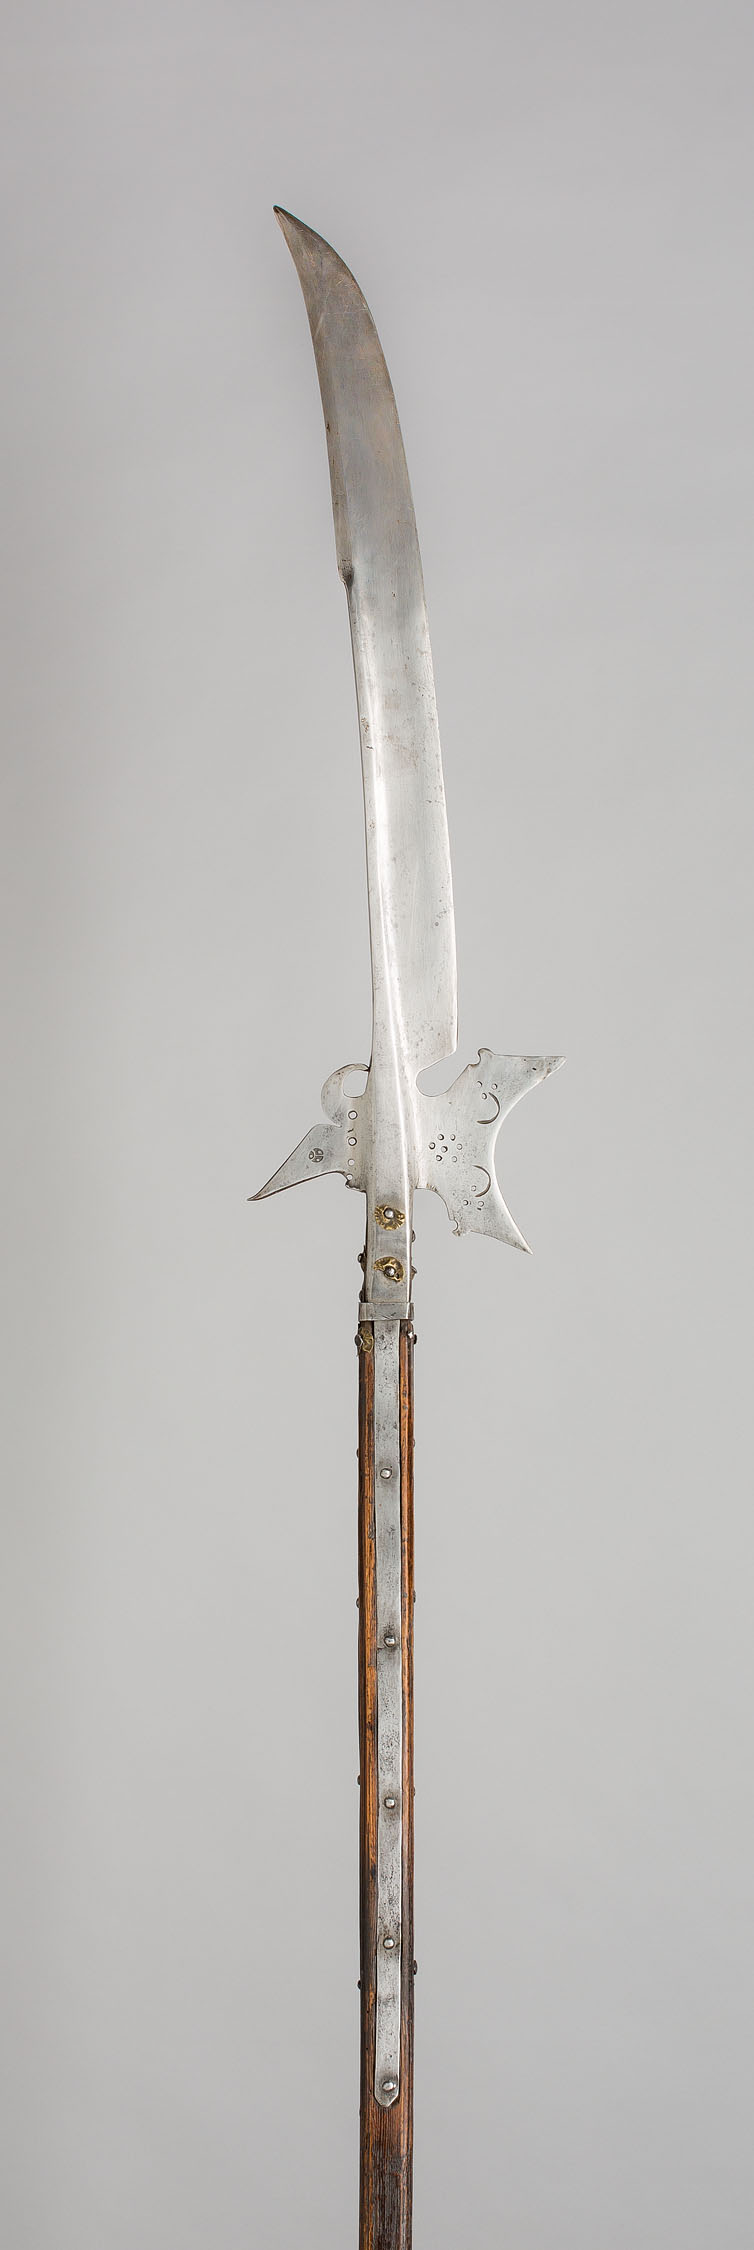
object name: Arms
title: Glaive-Halberd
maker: German (Bavaria)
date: 1650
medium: Steel, wood (oak), and iron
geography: Germany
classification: edged weapon-staff; arms; arms and armor